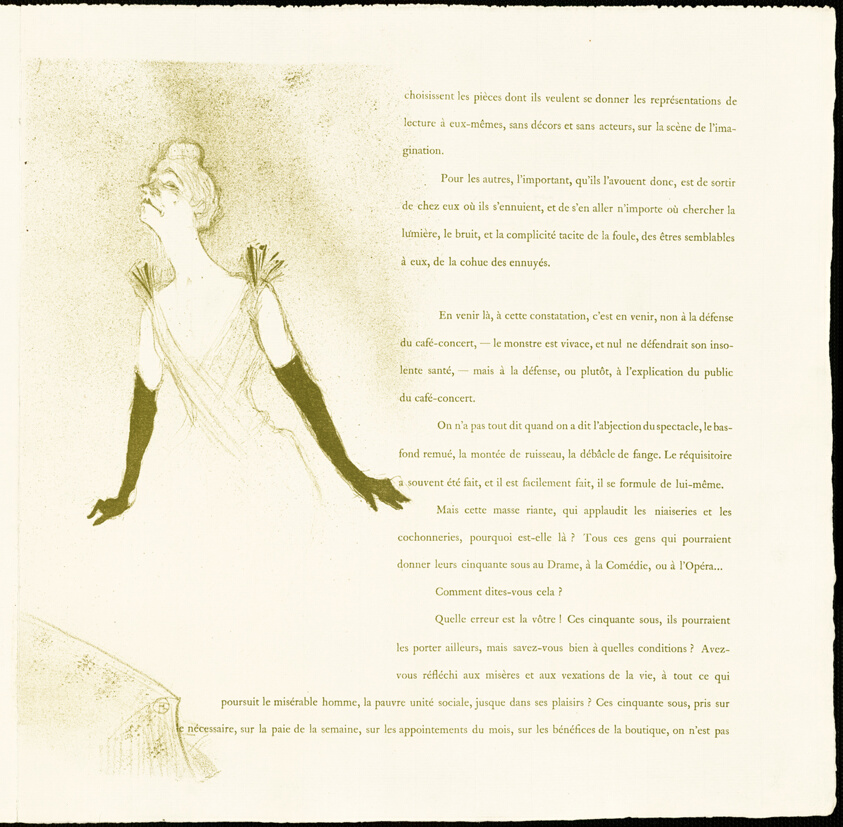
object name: Print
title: Yvette Guilbert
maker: Henri de Toulouse-Lautrec (French, 1864-1901)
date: 1894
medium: Color lithograph, with letterpress, on ivory laid paper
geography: France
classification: lithograph; print; prints and drawing